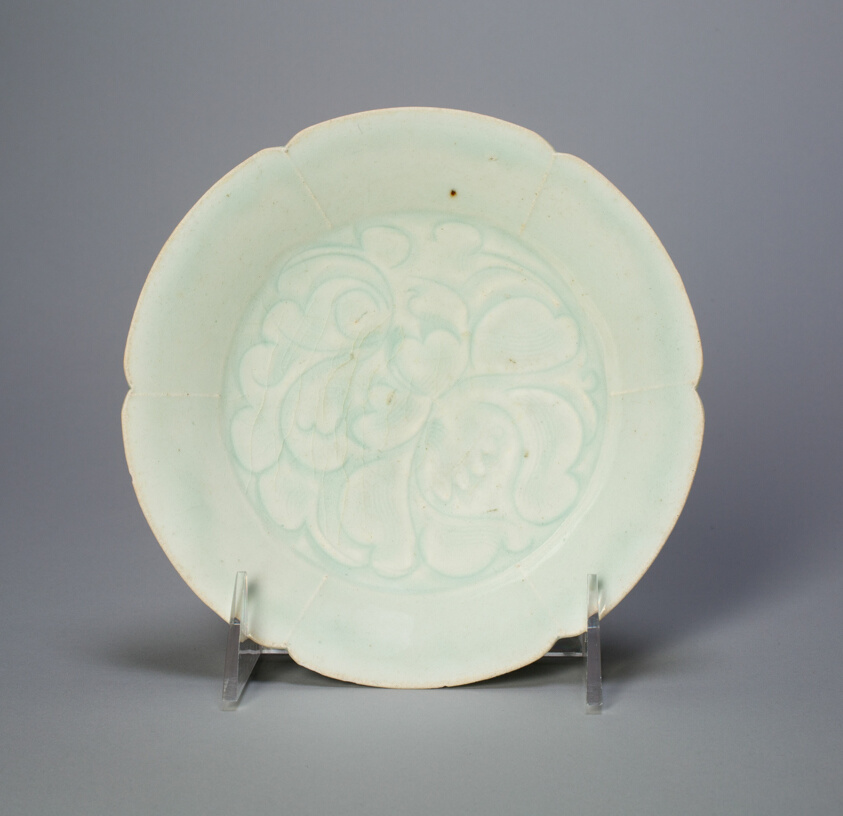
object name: Vessel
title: Foliate Bowl with Stylized Peony Spray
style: Chinese (culture or style)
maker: China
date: Northern Song dynasty (960–1127), 12th century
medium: Qingbai ware; porcelain with underglaze carved decoration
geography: China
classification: bowl; porcelain; dish (vessel); asian art; ceramics; vessel